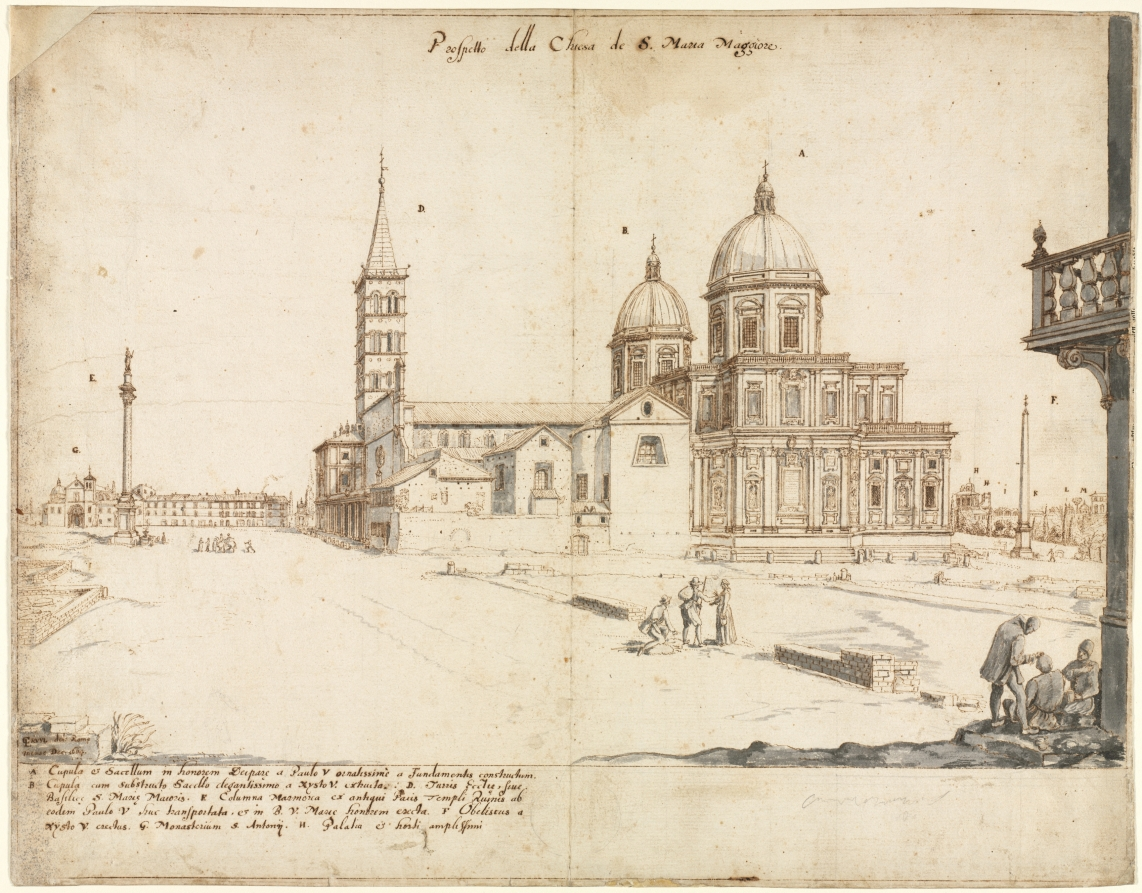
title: Eighteen Views of Rome: The Basilica of Santa Maria Maggiore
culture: Flanders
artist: Lievin Cruyl (Flemish, c. 1640-c. 1720)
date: 1664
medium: pen and brown ink and brush and gray wash over stylus and graphite; framing lines in brown ink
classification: Drawing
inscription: signed, lower left, in brown ink: [artist's monogram: LC] RVYL del: Romæ / mense Dec: 1664. ; by artist, upper center, in brown ink: Prospetto della Chiesa de S. Maria Maggiore. ; by artist, throughout composition, in brown ink: [the letters A-M] ; by artist, lower left, in brown ink: A Cupula et Sacellum in honorem Deiparæ a Paulo V ornatissimè a Fundamentis constructium. / B Cupula cum substructo Sacello elegantissimo a Xysto V. extructa. . D. Turris Eccliæ, sive / Basilicæ S. Mariæ Maioris. E Columna marmorea ex antiqui Pacis Templi Ruinis ab / eodem Paulo V huc transportata, es in B. V. Mariæ honorem erecta. F Obelistus a / Xÿsto V. erectus. G. Monasterium S. Antonij. H. Palatia et hosti amplissimi ; lower right, in graphite: [illegible] ; VERSO, upper left, in brown ink: [illegible]5 ; ON STRIPS OF PAPER MOUNTED TO VERSO, lower center, in graphite: A. 20973 ; lower right, in graphite: E .5